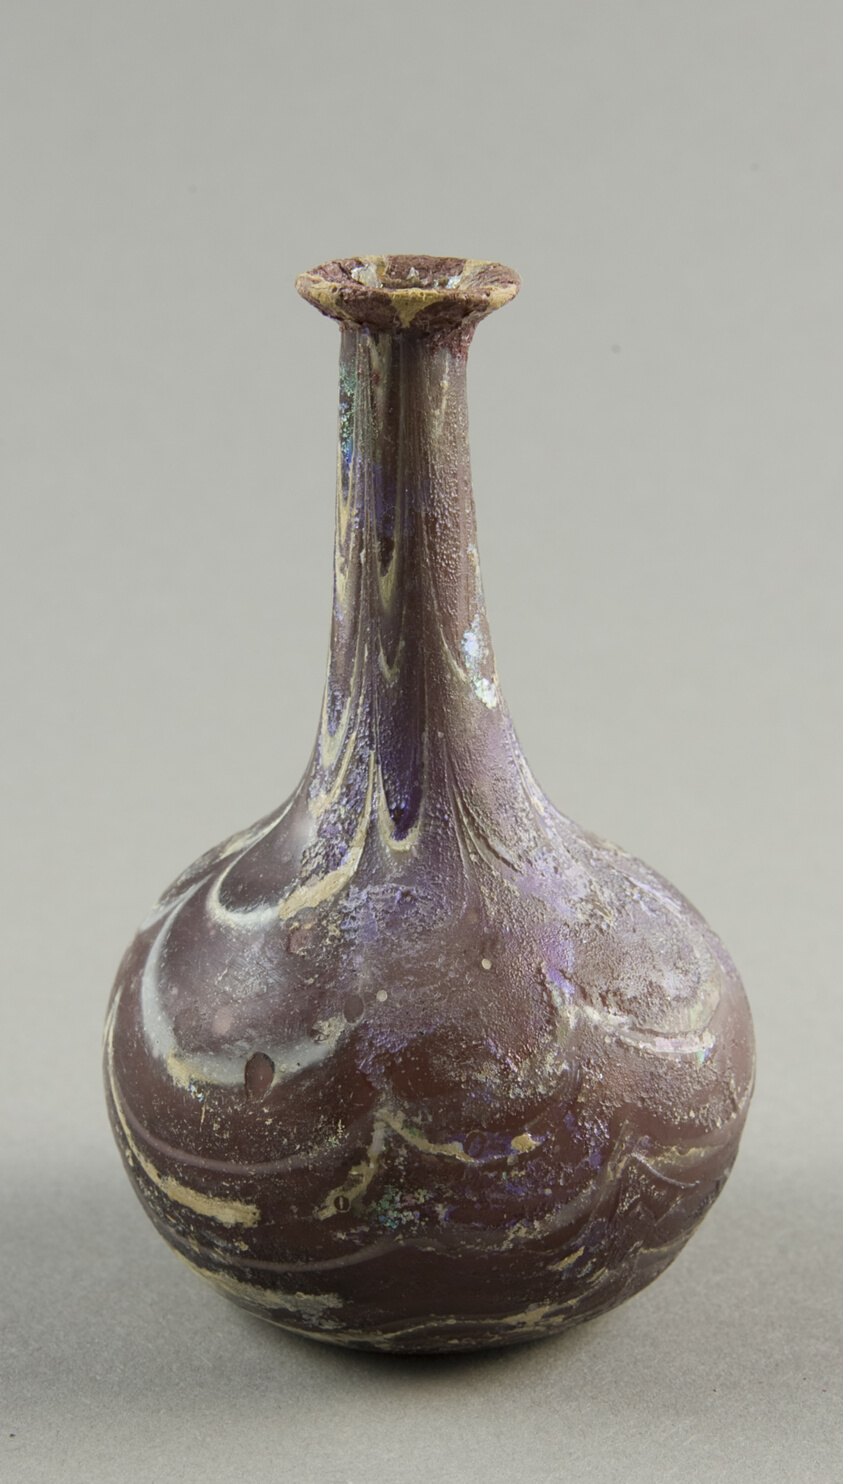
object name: Vessel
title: Bottle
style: syrian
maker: Roman; Levant or Syria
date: 1st century BCE-1st century CE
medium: Glass, blown technique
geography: Syria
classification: bottle; glass; vessel; ancient art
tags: bottles